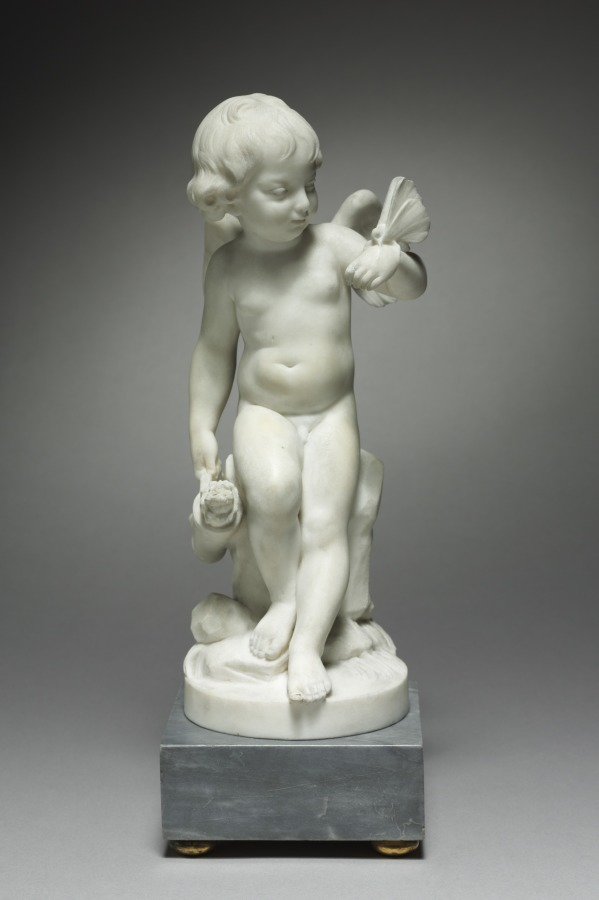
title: Pair of Marble Statuettes: Fickle Love and Faithful Love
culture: France, 19th century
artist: after Augustin Pajou (French, 1730–1809)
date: 1800s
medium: marble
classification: Sculpture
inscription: Signed Pajou f (fecit) 1787